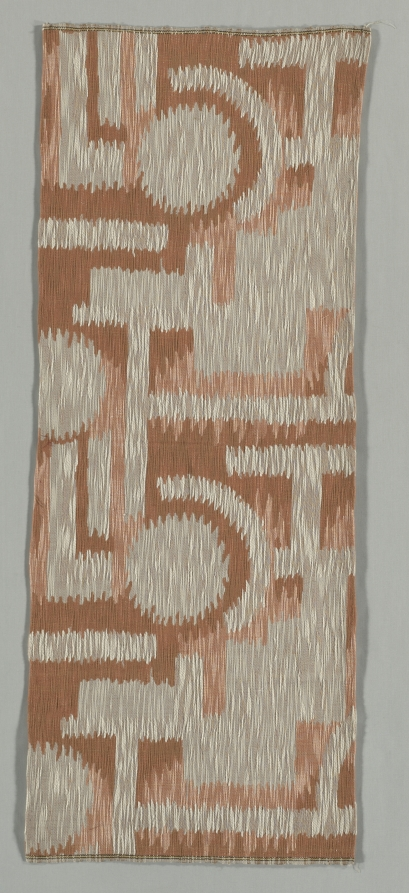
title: Textile Fragment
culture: France, 1930s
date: 1900–1941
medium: rayon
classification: Textile